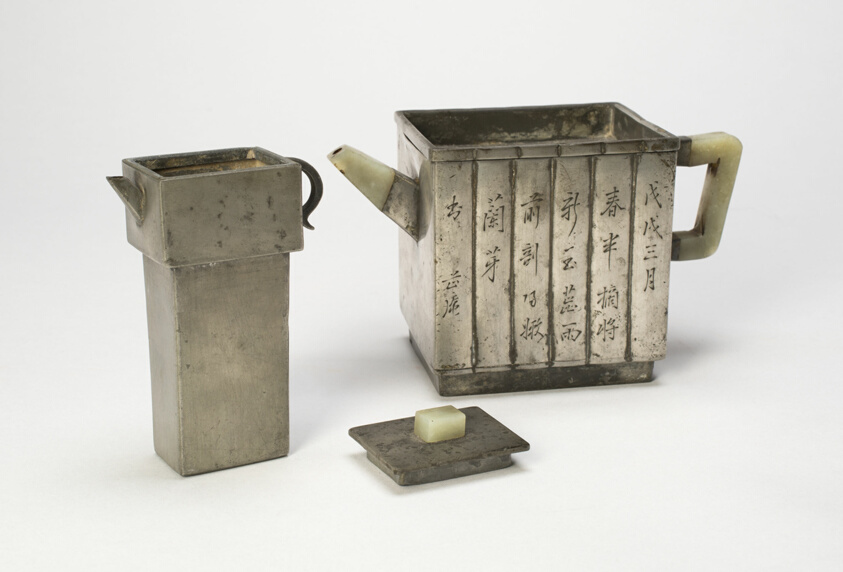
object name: Vessel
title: Heater for Rice Wine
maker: China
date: Ming dynasty (1368–1644)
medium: Pewter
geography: China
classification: pewter; metalwork; asian art